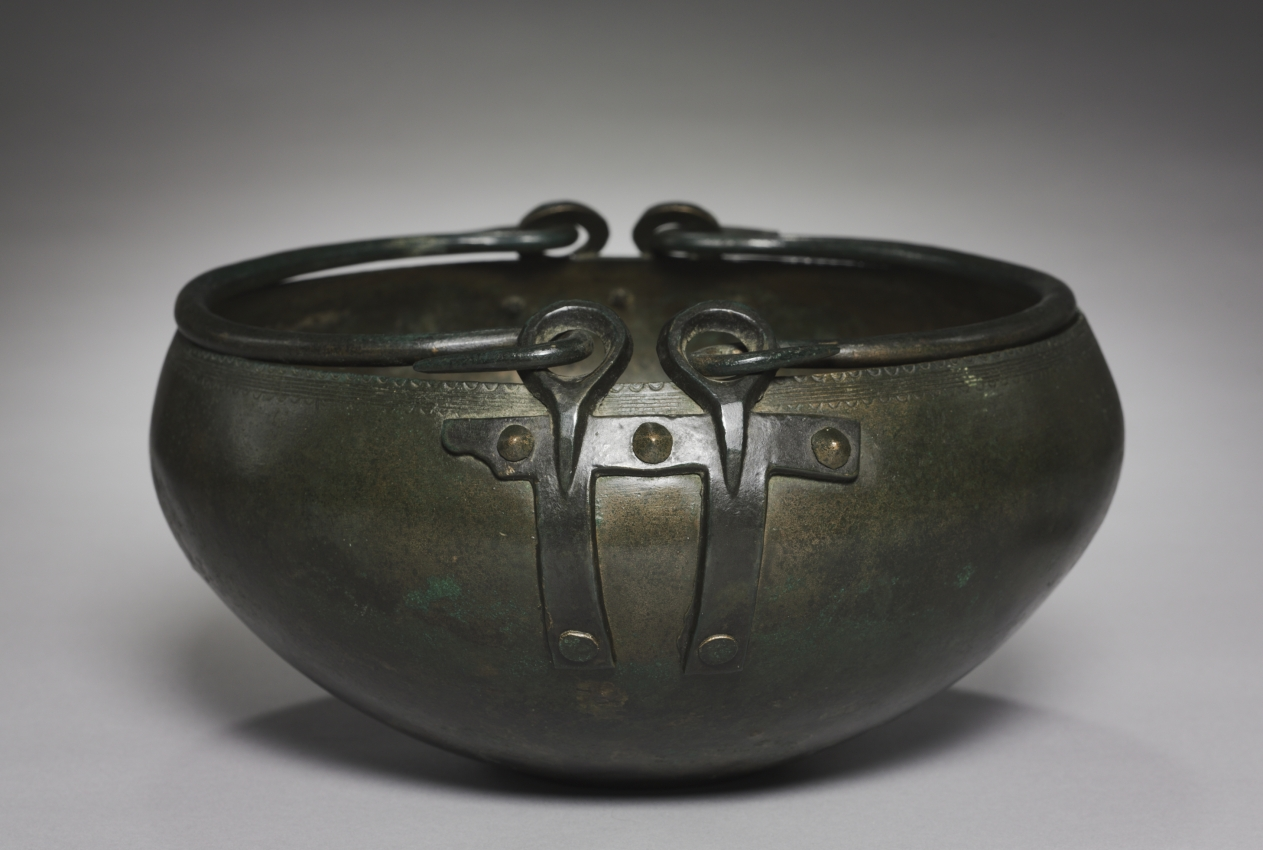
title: Ritual Cauldron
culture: Hungary, Bronze Age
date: c. 1000–900 BCE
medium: bronze, hammered, cast and wrought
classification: Metalwork